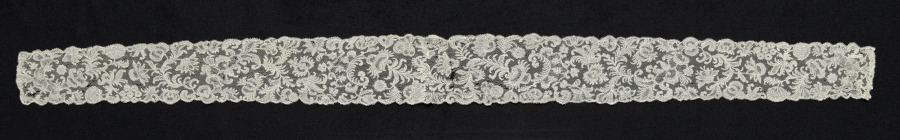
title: Lace Lappet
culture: Belgium, Brussels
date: 1700–1720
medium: Linen: bobbin lace (Point d'Angleterre)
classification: Lace